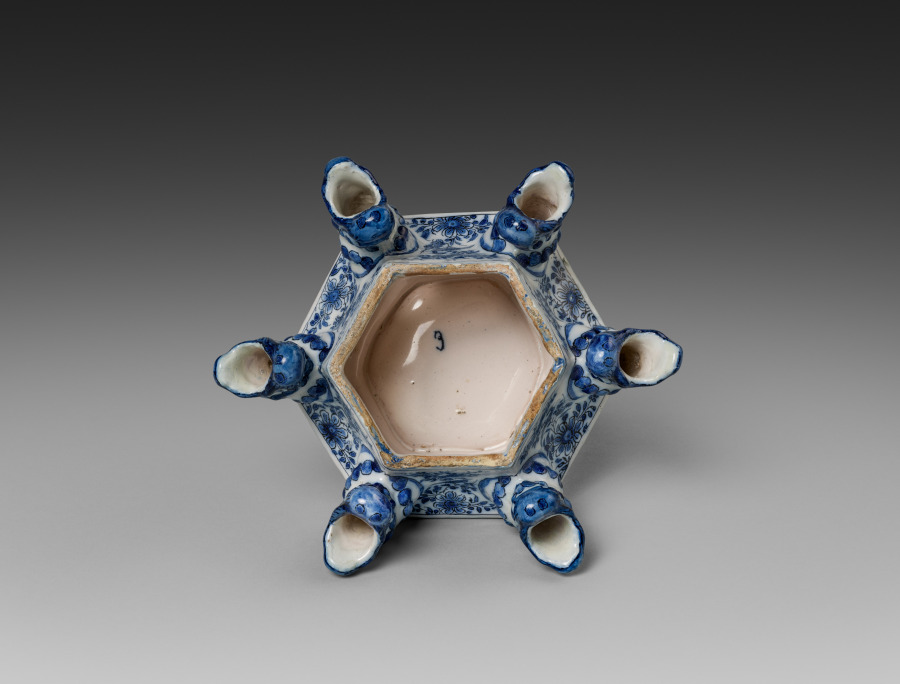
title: Fourth Tier for a Flower Pyramid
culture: Netherlands, Holland, Delft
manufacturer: Adrianus Kocx (Dutch, active 1686–1701)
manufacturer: De Grieksche A (The Greek A) Factory (Netherlands, 1658–1811)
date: c. 1690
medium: Tin-glazed earthenware, painted in blue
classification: Ceramic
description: Allegorical figures representing Faith, Hope, and Love decorate the base of this pyramid, on which rest six tiers with spouts where flowers can be placed. Flower pyramids are among the most complex and luxurious types of ceramics produced in Delft in the late 1600s. This example was made in the Greek A Factory, owned by Adrianus Kocx. During his tenure, the factory became the most prestigious of Delft potteries and received commissions from Queen Mary II, who ruled over England, Scotland, and Ireland together with her husband, William III. She contributed to the international spread of the fashion for Delft ceramics.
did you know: The iconic blue-and-white ceramics from Delft originated as an attempt to copy Chinese porcelain.